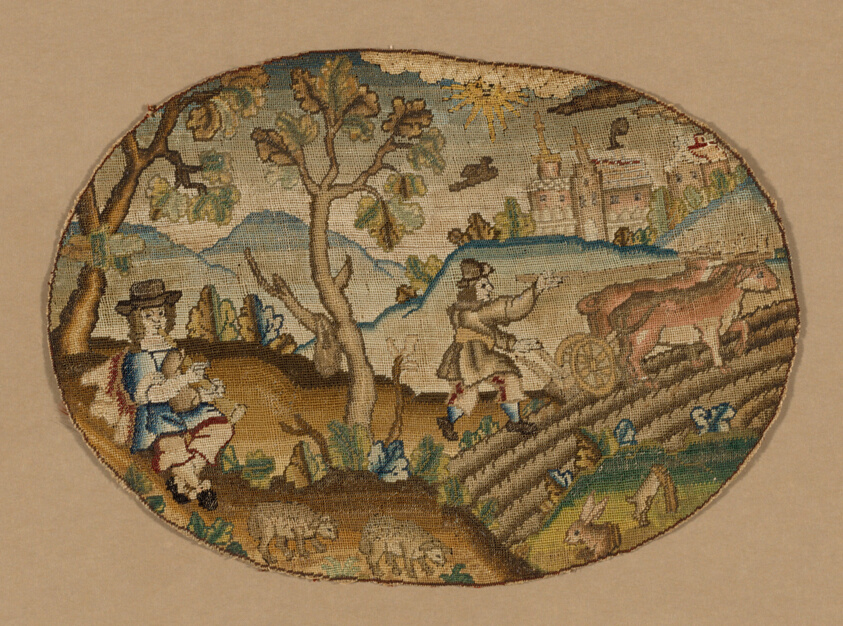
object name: Textile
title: Fragment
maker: England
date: 17th century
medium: Linen, plain weave; embroidered with silk floss and wool yarns in tent stitch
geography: England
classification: textile; needlework (visual works)